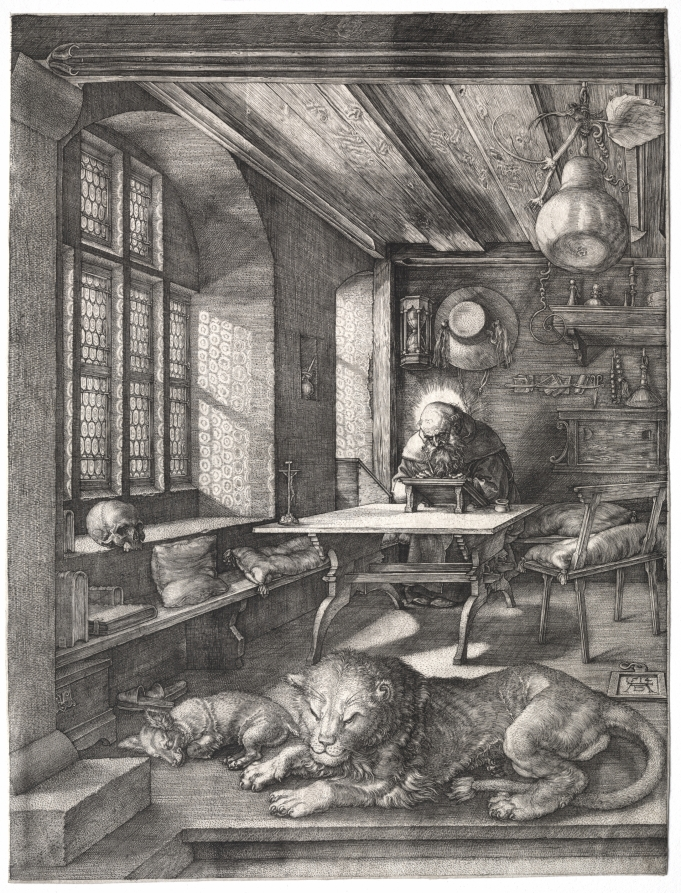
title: St. Jerome in his Study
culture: Germany, late 15th-early 16th century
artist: Albrecht Dürer (German, 1471–1528)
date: 1514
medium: engraving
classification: Print